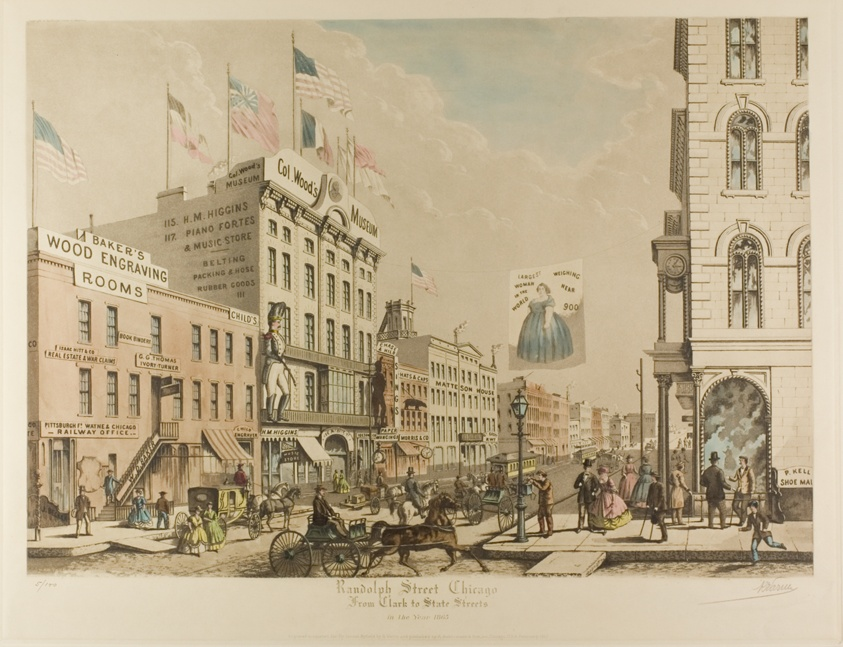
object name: Print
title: Randolph Street, Chicago, from Clark to State Streets in the Year 1865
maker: Raoul Varin (French, 1865-1943)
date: published 1926–28 (1865 depicted)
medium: Aquatint, with hand-coloring, on cream wove paper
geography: France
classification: aquatint; print; prints and drawing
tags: Chicago